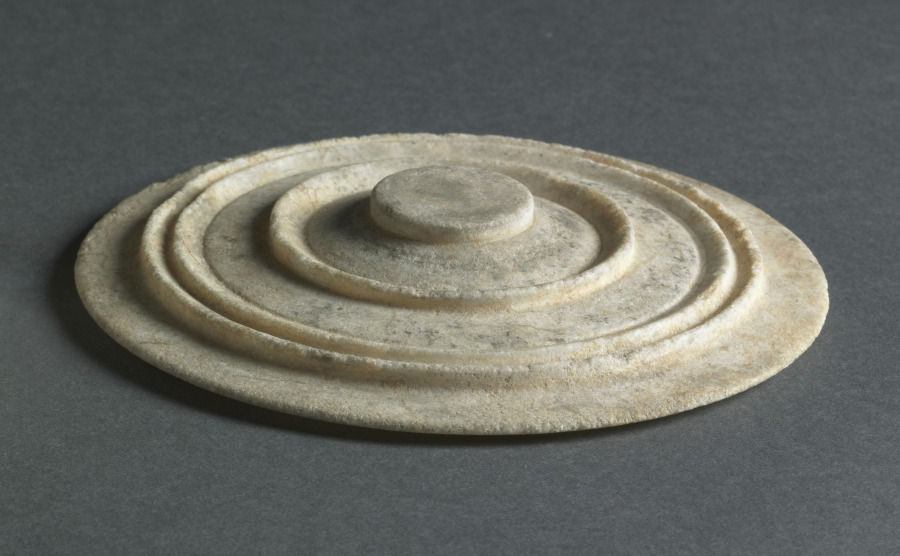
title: Pyxis (lid)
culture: Greece, Attic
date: 400–300 BCE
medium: marble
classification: Stone